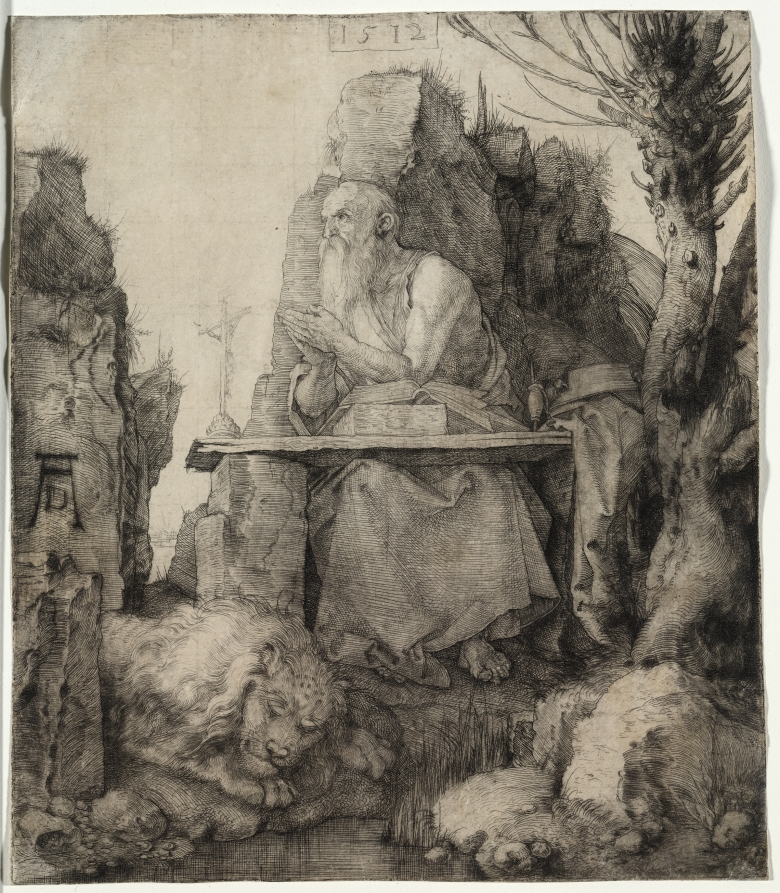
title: St. Jerome Seated near a Pollard Willow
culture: Germany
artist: Albrecht Dürer (German, 1471–1528)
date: 1512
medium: drypoint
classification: Print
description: Of the hundreds of prints Albrecht Dürer made, only three were drypoints, in which a needle scratched directly into a copperplate creates velvety, fuzzy lines. In this image of Saint Jerome, Dürer exploited these qualities of drypoint to manifest the natural, spiritual realm of the saint’s hermitage in the wilderness. Jerome pauses from his studies to pray in a setting that buzzes with life. The saint’s isolation and communion with Christ result in spiritual rebirth, symbolized by the bumpy pollard (trimmed) willow, cut to generate new growth.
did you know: This is one of only three prints Albrecht Dürer made using drypoint, in which a needle is scratched directly into the copperplate.